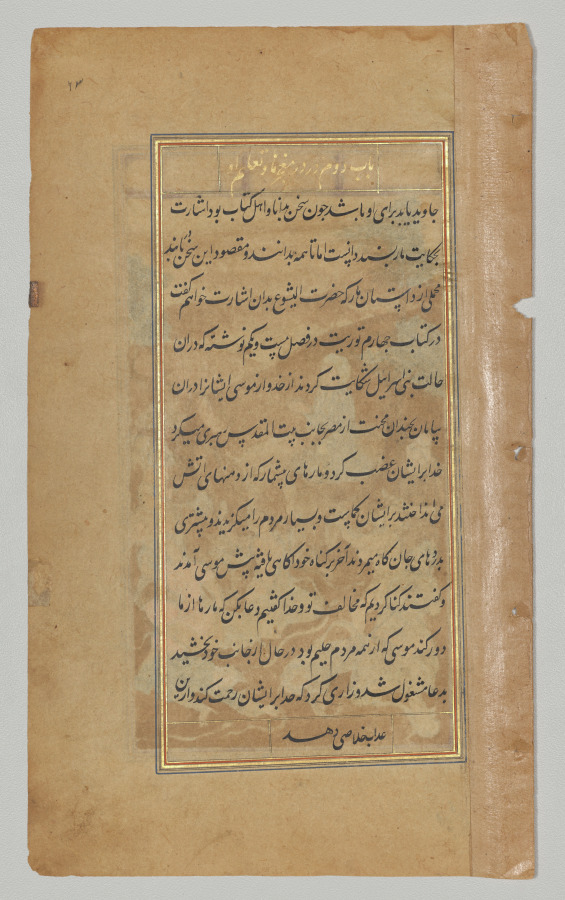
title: Moses praying to end the serpents’ attack on the Israelites (folio 63 verso), from a Mirror of Holiness (Mir’at al-quds) of Father Jerome Xavier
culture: Mughal India, Allahabad, made for Prince Salim (1569–1627)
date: 1602–4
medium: Gum tempera, ink, color, and gold on paper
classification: Manuscript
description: After the Israelites complained about the difficulties of their journey out of Egypt, God punished them for their lack of gratitude by sending snakes to bite and plague them. Apparently reveling in the brutality of the scene, the artist shows men and women alike being savaged by snakes, one of whose tail slithers over the rulings of the right margin. An Israelite woman raises her hands and pleads with Moses to help them, promising repentance, and he intercedes on their behalf. Father Jerome used this episode to demonstrate how repentant believers merit salvation.